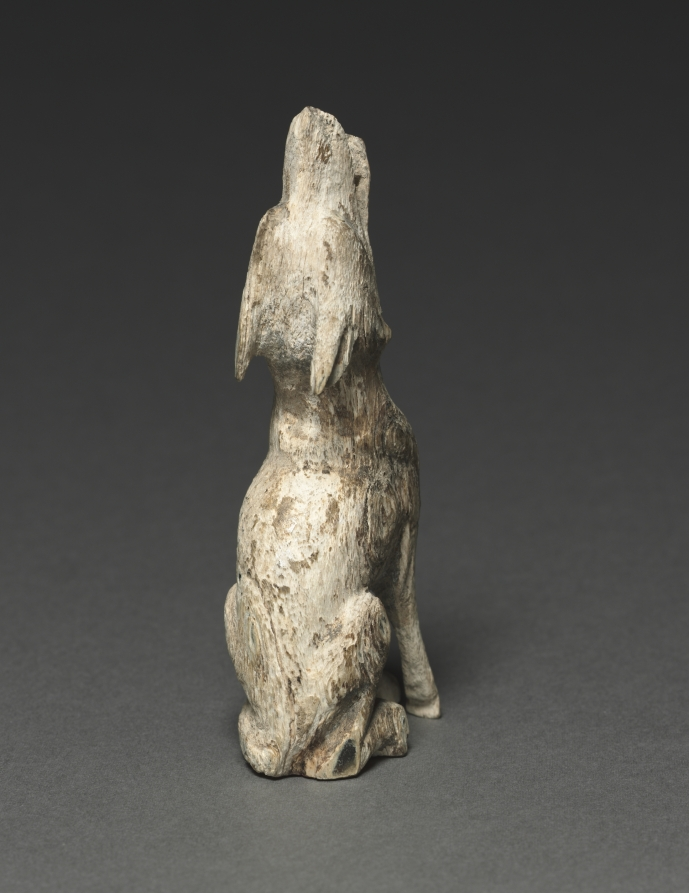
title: Howling Wolf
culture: Southern Siberia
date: c. 500–200 BCE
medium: wood with shell inlays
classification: Wood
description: Its subject, size, materials, and naturalistic style suggest that this small sculpture was made by one of the nomadic peoples of Western and Central Asia—perhaps the Scythians, who, with the Medes, conquered the Assyrians. Works of art made by the Scythians and other nomadic groups are shown on the northwest wall of this gallery.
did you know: The artist captured this wolf in mid-howl, depicting a wild animal in its natural element. The naturalistic carving of the wood depicts the animal's features, making it recognizable despite the eroded surface.